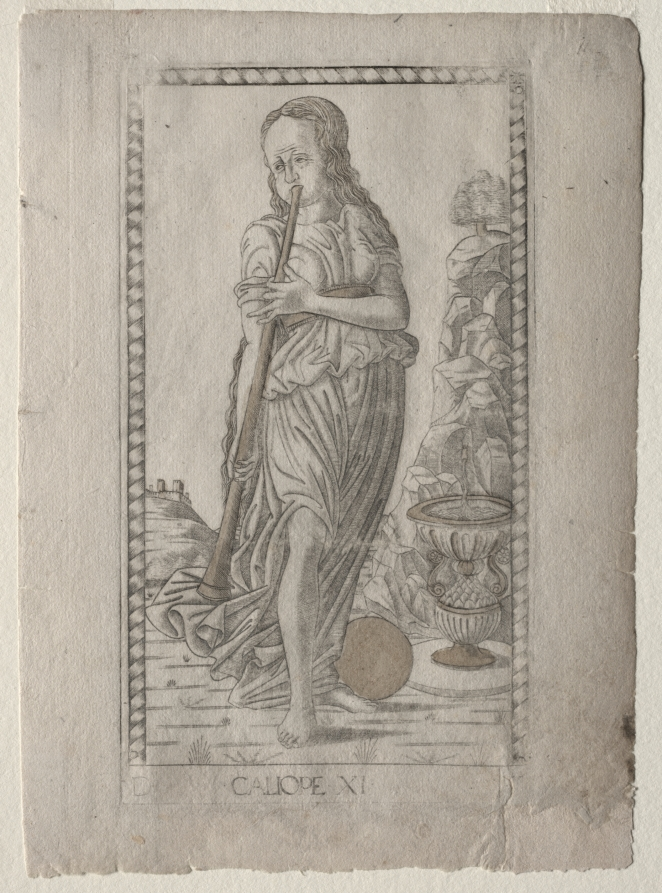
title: Calliope (from the Tarocchi series D: Apollo and the Muses, #11)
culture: Italy, Ferrara, 15th century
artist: Master of the E-Series Tarocchi (Italian, active 1460s)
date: before 1467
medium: engraving hand-colored with gold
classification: Print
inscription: Lettered below the image of Caliope (Calliope): ·D· / ·CALIOPE·XI· / [11]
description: This engraving is part of the Tarocchi group marked with the letter “D,” and named Apollo and the Muses. In Greek mythology, the nine Muses (Calliope, Urania, Terpsichore, Erato, Polyhymnia, Thalia, Melpomene, Euterpe, and Clio) were the daughters of Zeus, king of the gods, and Mnemosyne, the Titaness of memory. The Muses were goddesses presiding over different branches of the arts and sciences. Their leader and supervisor was Apollo, the god of light, music, prophecy, and poetry. Here, Caliope (Calliope) is personified as a full-length female figure, playing a long horn. Next to her is a fountain. This symbolizes the Greek Castalian font at Mount Parnassus, sacred to the Muses and believed by poets to be a source of inspiration. Calliope was regarded as the foremost of the Muses and the one prompting epic poetry.